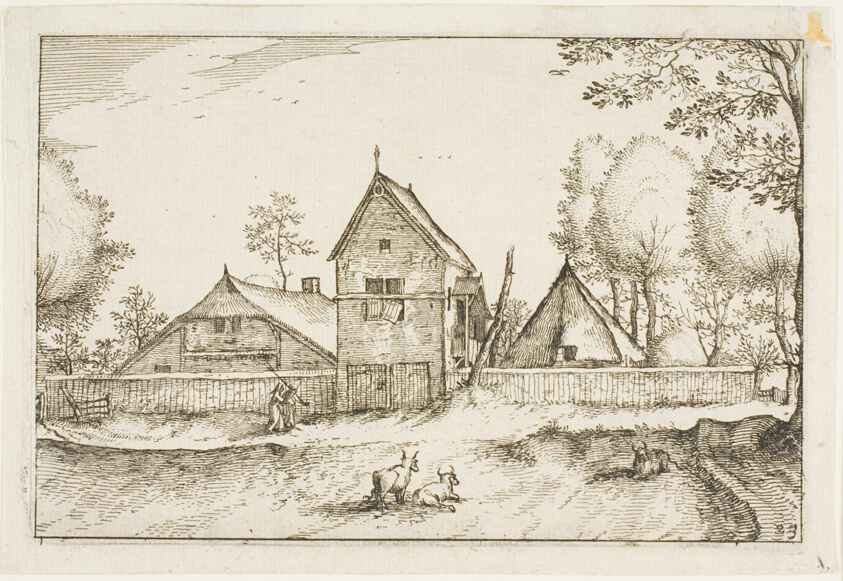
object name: Print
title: Large Walled Farm, plate 23 after Pictures of Farms, Country Houses and Rustic Villages (Praediorum villarum et rusticarum casularum icones)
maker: Claes Jansz. Visscher (Dutch, 1587-1652); after Unknown Flemish Artist, misidentified as Pieter Bruegel, the elder (Flemish, 1525/30-1569)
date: 1612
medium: Etching in black on ivory laid paper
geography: Netherlands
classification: etching; print; prints and drawing